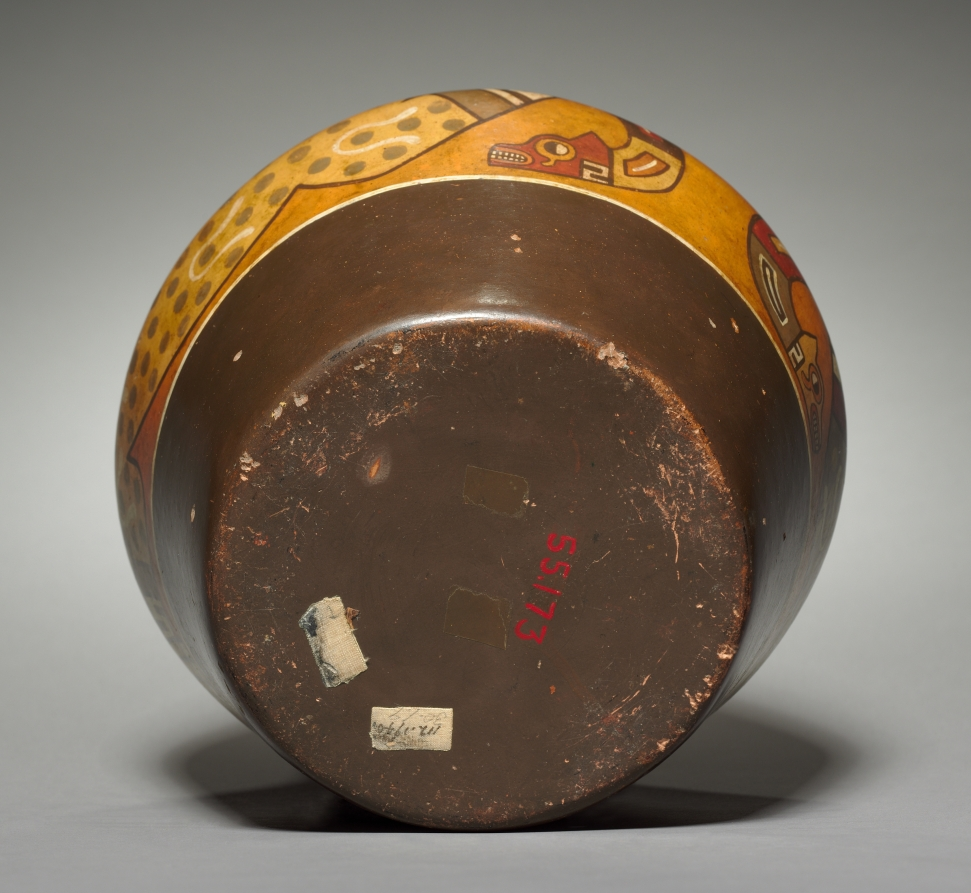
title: Vessel (modern version of a Wari-style vessel)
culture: Peru, modern, 20th century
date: before 1955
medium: pottery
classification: Forgery